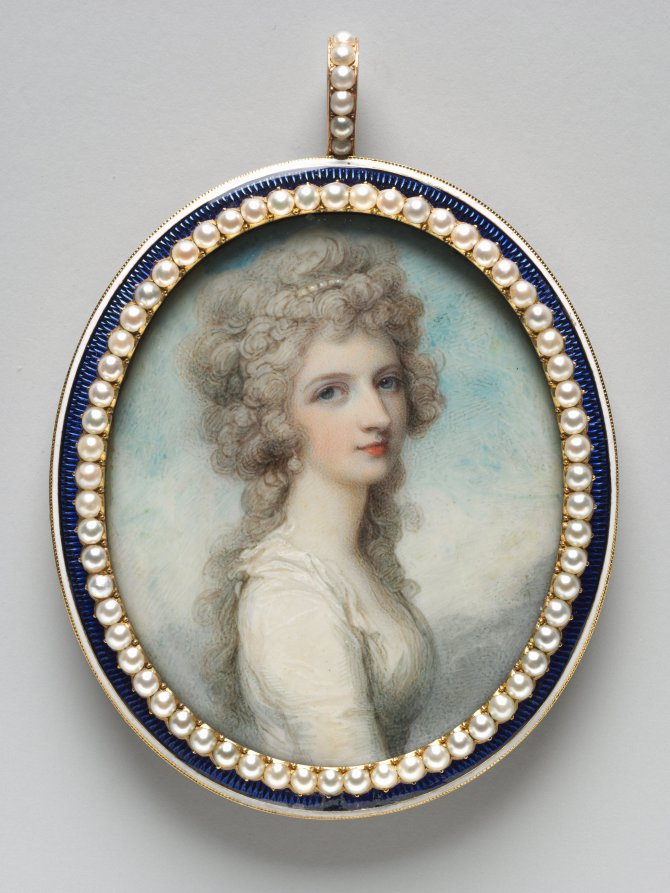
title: Portrait of Mary Frances (Fanny) Swinburne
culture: England, 18th century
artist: Richard Cosway (British, 1742–1821)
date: c. 1786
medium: watercolor on ivory in a gold, enamel, and split pearl frame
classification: Portrait Miniature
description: Mary Frances (Fanny) Swinburne (d. 1828) was the eldest daughter of the travel writer Henry Swinburne. This portrait was painted around 1786, when Richard Cosway was reaching the mature stage of his career and was among the most sought after miniature painters in London. In this work the sitter’s hair is adorned with pearls—a style commonly seen in portraits of the period. She wears an earring in her right ear. Her bright blue eyes, rosy cheeks, and red lips are accentuated by her mass of curled, powdered hair and her pale skin and gown. This work is a classic example of Cosway’s elegant female portraits, exhibiting the nearly monochromatic palette and free style that would be so decisively rejected in the next century by such artists as Andrew Robertson (1777–1845) and William Charles Ross (1794–1860). The miniature is placed in a twentieth-century revival period gold and blue enamel frame with graduated split pearls. This ornate type of frame was especially popular among early-twentieth-century collectors who felt that it suited the grandeur of miniatures by Cosway and his circle, the female portraits of which were so often composed of the pale tones of gauzy dresses, blue skies, and pearl-ornamented hair.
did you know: Richard Cosway painted Mary Frances’s parents, Henry and Martha, in the same year he painted this.